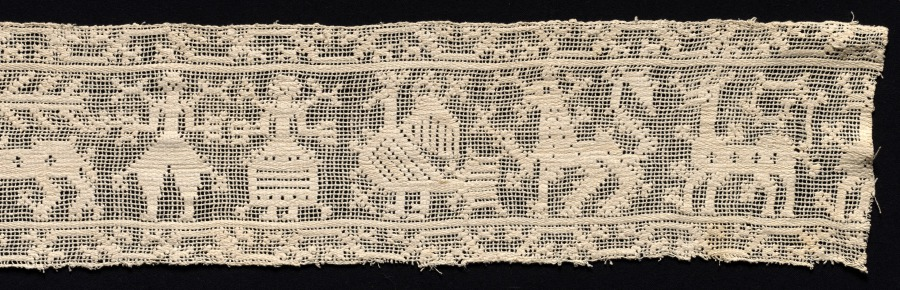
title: Band with Parade of Human Figures, Stags, and Other Fantastic Animals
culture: Italy, Sicily ?, 1500s-1600s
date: 1500s-1600s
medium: Bleached linen (est.): needle lace, burato (twined ground and darned in one direction)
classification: Lace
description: Animals viewed in profile, some with their legs raised, indicate movement, such as a parade or procession. However, the human figures are shown frontally. Linear elements protruding from their backs and hands held out and open suggest the figures may be angels modeling a gesture of prayer.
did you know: Myrta Leonora Jones, the donor of this lace, was a women’s rights activist in Cleveland in the early 1900s.